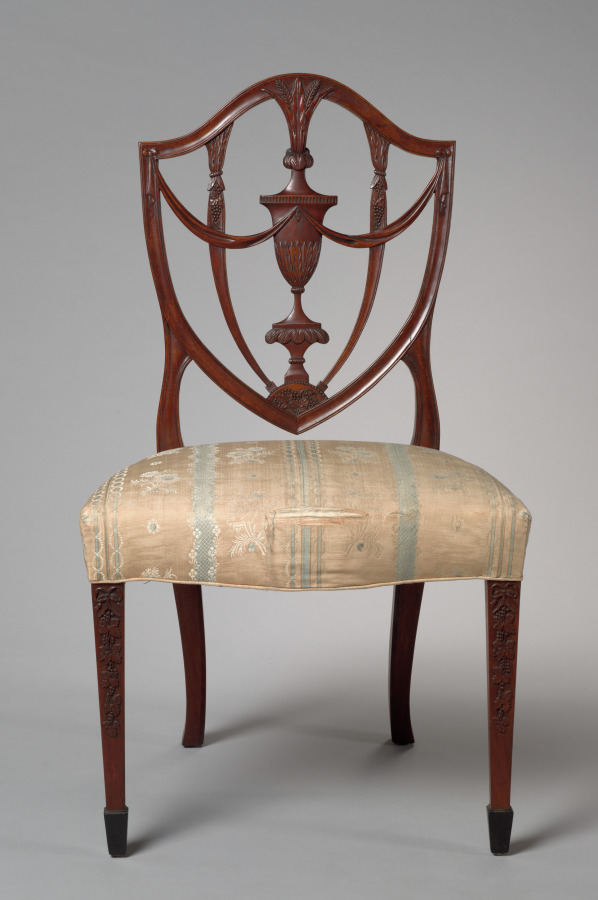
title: Chair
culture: America, Salem, early 19th Century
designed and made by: attributed to Samuel McIntire (American, 1757–1811)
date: c. 1800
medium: mahogany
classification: Furniture and woodwork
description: This chair exemplifies the neoclassic style in America. Design books published by British cabinetmakers transmitted the style to the New World. Indeed, Samuel McIntire found inspiration for this chair in Plate 2 from the 1794 edition of George Hepplewhite's Cabinetmaker and Upholsterer's Guide. The McIntire chair's shield-shaped back, however, is pointed rather than rounded, and the front legs, enriched with carved grapevines, have tapered "spade" feet with ebony applied. McIntire's carving skill brought him great success in Salem, a town half the size of Boston, but where some of the finest furniture of the period was made. This chair comes from a set owned by the Derby family, one of the most prominent in Salem.